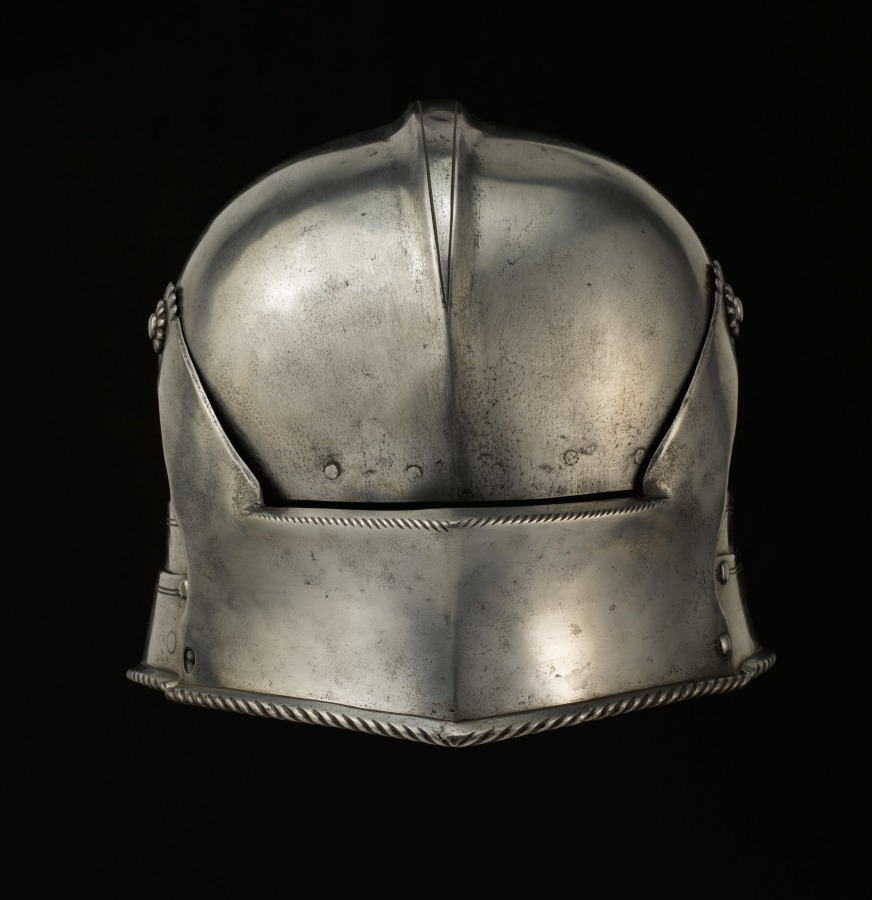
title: Visored Sallet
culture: Germany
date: c. 1490–1500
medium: steel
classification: Arms and Armor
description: The sallet is a partly open-face helmet common in Europe during the 1400s, used in both equestrian and infantry versions. Sallets with movable visors, like this example, are considered to be more technically and visually interesting; beautifully streamlined, it assumes a highly sculptural teardrop shape. Originally it would have been part of a complete suit of armor. The sallet became the quintessential helmet form of the late Middle Ages and is frequently represented in medieval miniatures and woodcuts.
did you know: Medieval sallets were design inspiration for modern-day fireman's helmets.